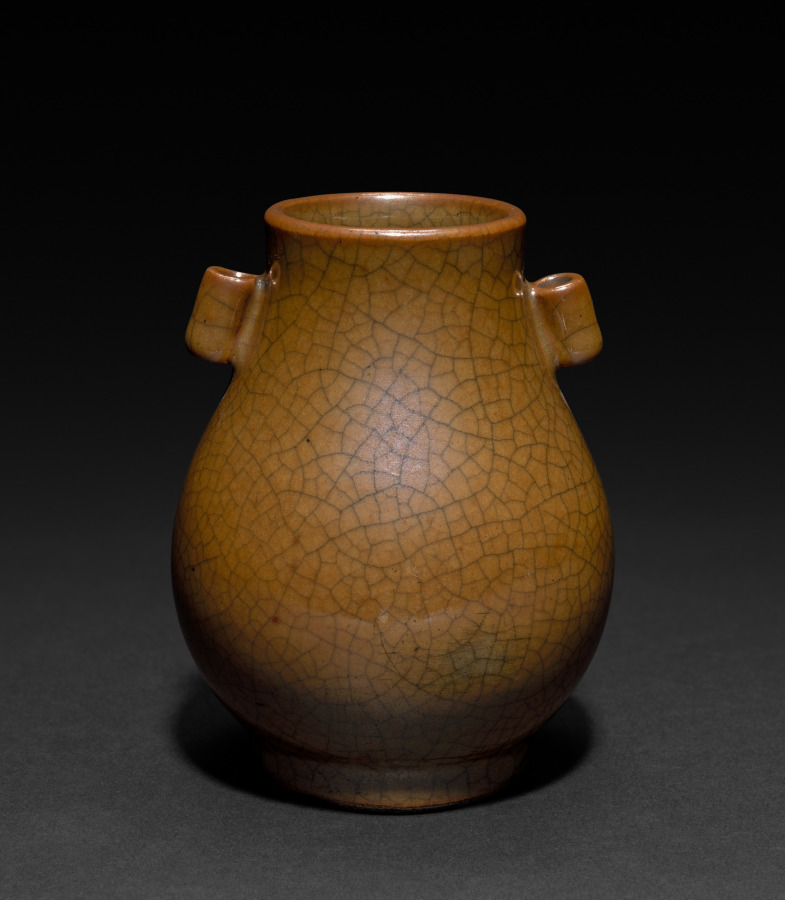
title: Pear-shaped Jar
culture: China, Qing dynasty (1644-1911), Kangxi reign (1661-1722)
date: 1661–1722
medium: porcelain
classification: Ceramic